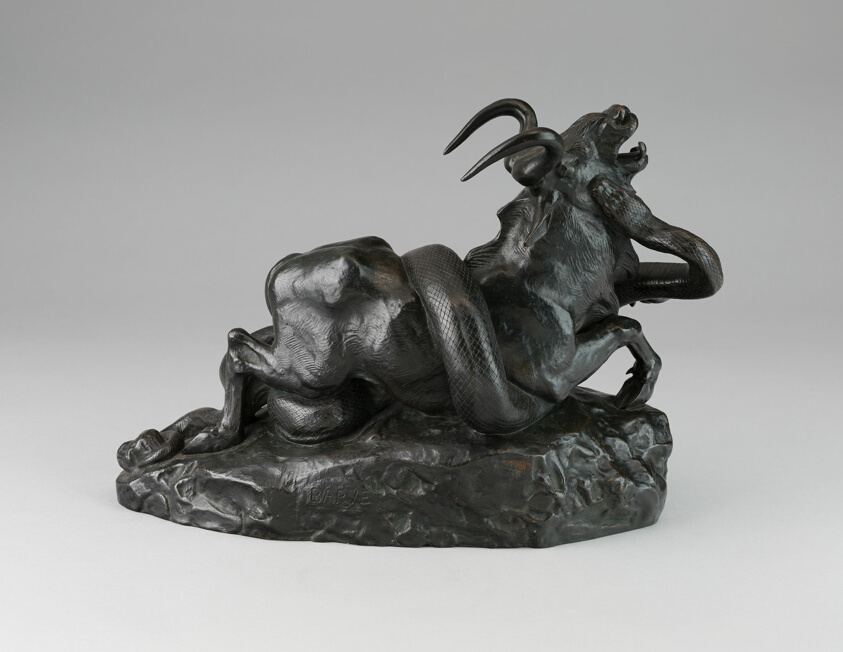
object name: Sculpture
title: Python and a Gnu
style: nineteenth century, 20th Century, 19th century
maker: Antoine Louis Barye (French, 1795–1875)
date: Cast c. 1934/35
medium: Bronze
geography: France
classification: statuette; french; sculpture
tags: animals, violence, snake, serpents, hunting, death